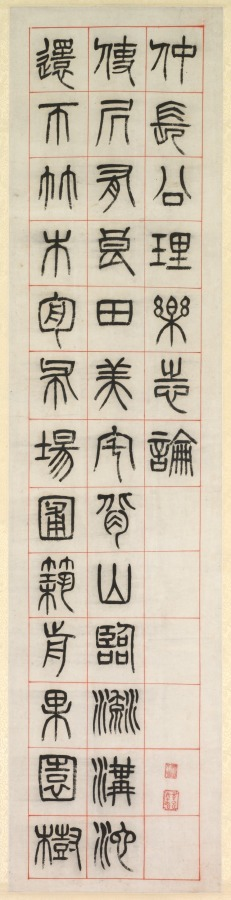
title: On Happiness, Calligraphy in Seal Script Style (zhuanshu)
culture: China, Changsu, Qing dynasty (1644-1911)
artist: Yang Yisun (Chinese, 1813–1881)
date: 1871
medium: hanging scroll, ink on paper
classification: Painting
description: Yang Yisun transcribed this ancient text on six narrow scrolls, starting at the top right and ending at the bottom left. Yang emphasizes the text’s historic nature by using the seal script style found on stone steles and bronze vessels. On Happiness features reflections of a scholar on a leisurely life in the countryside, composed by Han dynasty official Zhongchang Tong, who died the year the Han dynasty collapsed (AD 220). The idyllic life described in the text may bean evocation of the past in a time of national crisis. A decade before Yang wrote these scrolls, Anglo- French forces had looted and burned the Summer Palace in Beijing. At the same time, the domestic Taiping rebellion (1850–64), led by a religious fanatic to overthrow the Qing government, had devastated Yang’s homeland, the Jiangnan region, with an estimated 20 million lives lost.